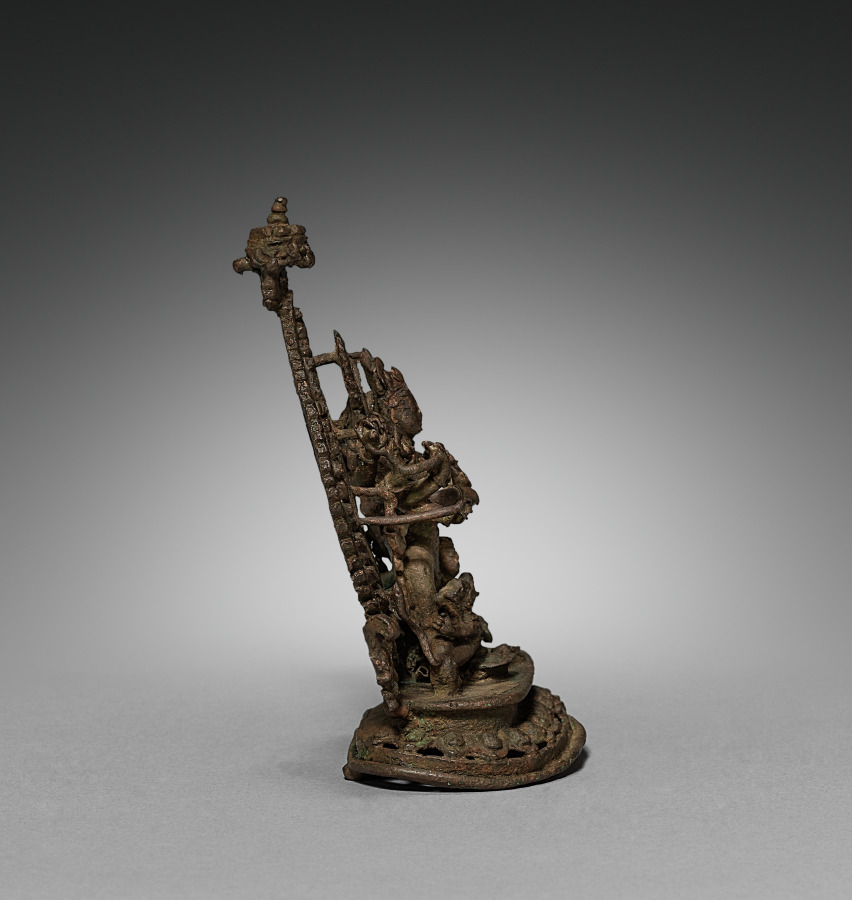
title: Durga Slaying the Demon Buffalo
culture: Nepal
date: 1500s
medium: bronze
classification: Sculpture